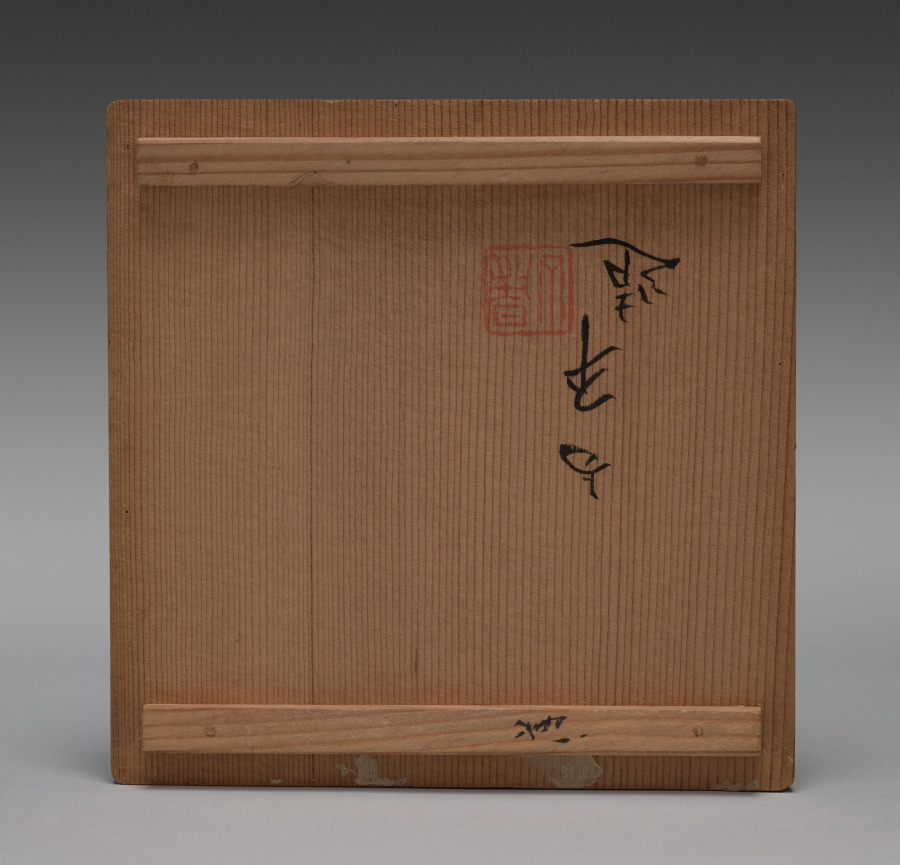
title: Teabowl with Pinks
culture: Japan, Meiji period (1868–1912)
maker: Seifū Yohei III (Japanese, 1851–1914)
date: 1893–1914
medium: Stoneware with crackled glaze and overglaze color enamel and gold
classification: Ceramic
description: This teabowl, for use in chanoyu, is a good example of Yohei III’s mastery of the techniques involved in producing Kyoto ware. The painting of the pinks, with their blue centers, bright red petals, and green leaves, is carefully controlled with crisp gold borders throughout. There is crackling in the transparent glaze and obvious, thick dripping of the milky glaze over the outside of the mouth of the bowl. The pink spots would have appeared in the clay during firing, and the bottom of the inside of the bowl is entirely pink. A triangular wedge has been cut away from the foot, and a gently impressed band rings the bowl beneath the rim.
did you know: The vessel comes with a bespoke brocade pouch with a silk fastening cord, as is customary for Japanese teabowls.